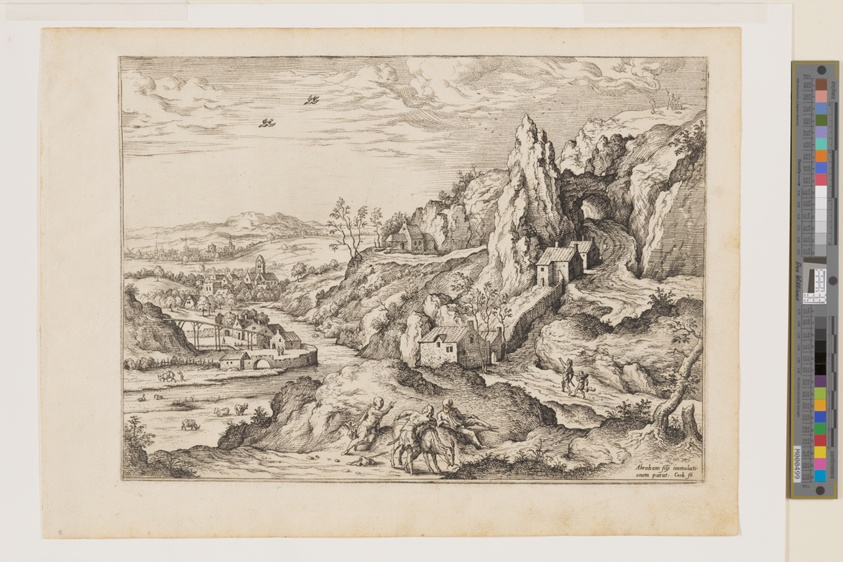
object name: Print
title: Abraham and Isaac on the Way to Sacrifice, from Landscapes with Biblical and Mythological Scenes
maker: Hieronymus Cock (Netherlandish, c. 1510–1570); after Matthys Cock (Netherlandish, c. 1505-1548)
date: 1558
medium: Etching on ivory laid paper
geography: Netherlands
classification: etching; paper; print; prints and drawing